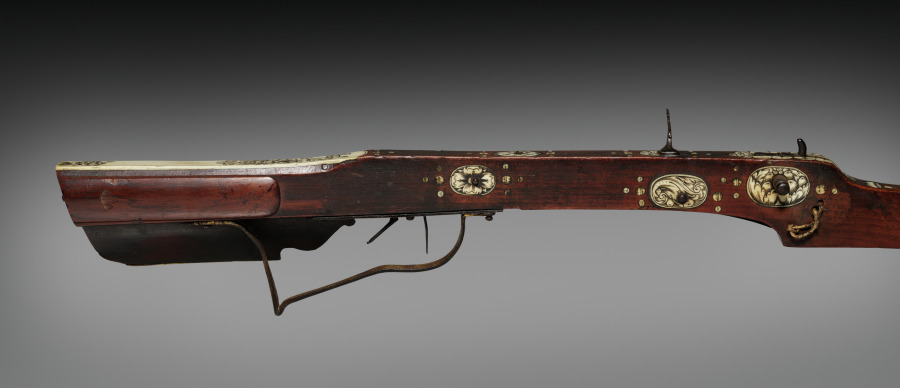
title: Pellet Crossbow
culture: Germany (?)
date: 1600s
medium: wood, inlaid with stag horn; flax cord; steel with traces of paint and gilding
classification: Arms and Armor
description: This ornate pellet crossbow is designed to fire molded clay pellets or small rocks, giving it the name stonebow. The bow is hand drawn and used for hunting small game.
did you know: This is a custom-made crossbow combining popular Italian and German designs of the 1600s.